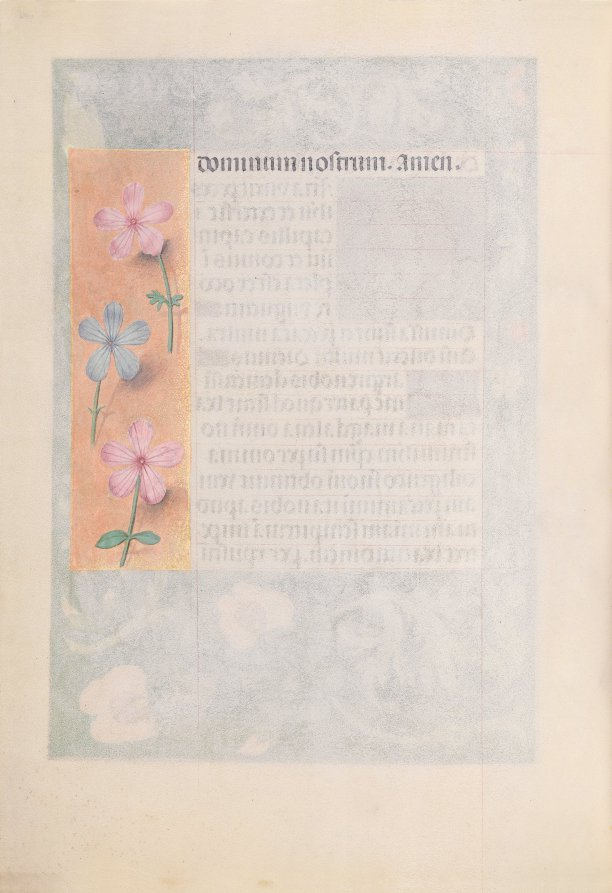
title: Hours of Queen Isabella the Catholic, Queen of Spain: Fol. 194v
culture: Flanders, Ghent and Bruges, late 15th century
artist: Master of the First Prayerbook of Maximillian (Flemish, c. 1444–1519)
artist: and Associates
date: c. 1500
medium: ink, tempera, and gold on vellum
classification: Bound Volume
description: This manuscript was illuminated by a circle of at least five highly organized manuscript painters active in the Flemish cities of Ghent and Bruges. The principal illuminator was Alexander Bening, who painted the majority of the book's miniatures. Manuscripts produced by this circle of artists are renowned for the decoration of their borders, which typically feature a rich variety of realistically-painted flowers, birds, and butterflies. This prayer book, called a book of hours, was intended not for a cleric, but for the private devotions of a lay person-in this case, Isabella the Catholic, Queen of Spain (1451-1504). Isabella's coat of arms embellishes the book's frontispiece. It is unlikely that the book was commissioned by the Queen herself; rather, she probably received it as a diplomatic gift from someone courting her patronage, perhaps Cardinal Francisco Jimenez de Cisneros. A Franciscan friar, Jimenez was dependent upon Isabella for his advancement, first to the post of Queen's confessor in 1492, and then to Archbishop of Toledo in 1495.